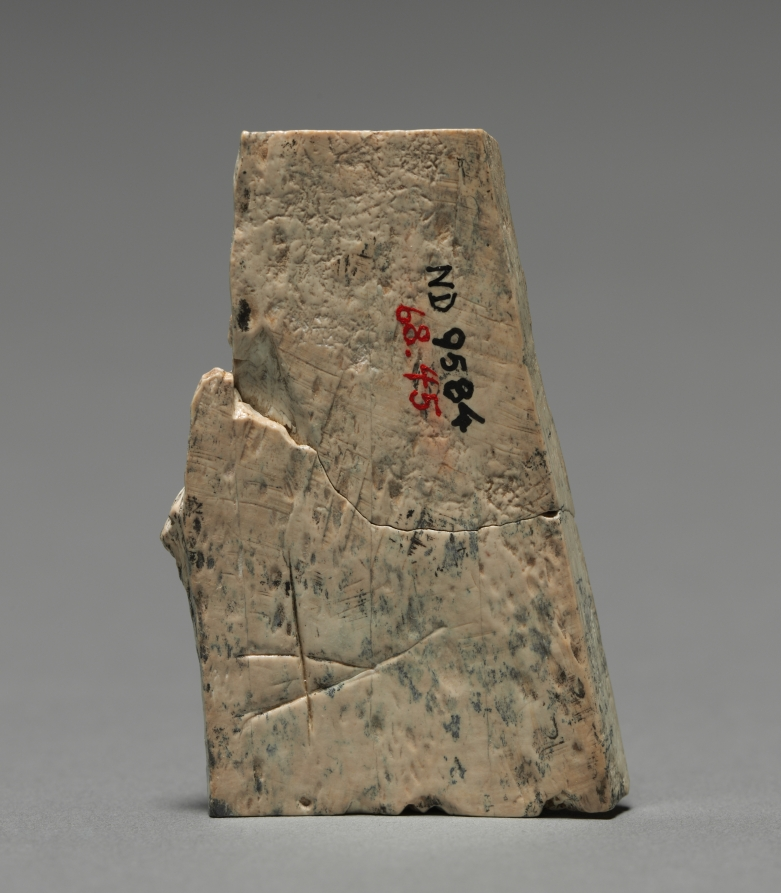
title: Decorative Plaque: Man; and Griffin in Combat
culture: Phoenicia, Iraq, Nimrud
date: 900–800 BCE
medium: ivory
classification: Ivory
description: This small plaque was executed in the Phoenician style with symmetrical compositions, elongated figural proportions, and Egyptian subjects and motifs. Examples have been found throughout the Middle East, but thousands come from Nimrud where most were excavated in the storerooms of a military arsenal built by King Shalmaneser II (858-824 bc). When the Nimrud palace was sacked in the 7th century bc, these ivories were thrown into a well, where Sir Max Mallowan (the husband of Agatha Christie) discovered them in 1951. The monumental wall relief (1943.246) was found at the same Assyrian palace at Nimrud.